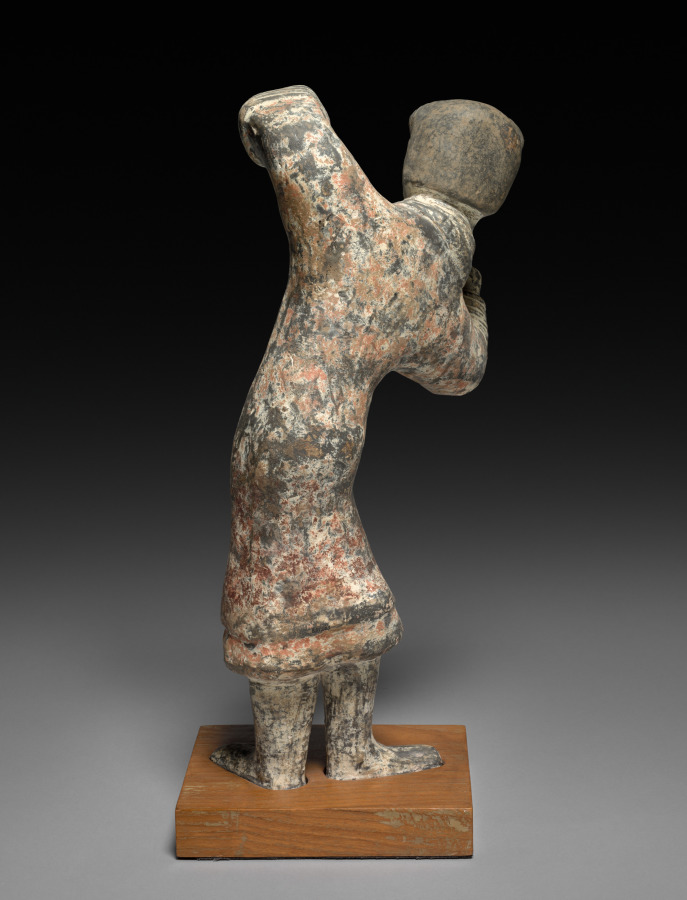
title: Dancing Figure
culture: China, style of Han dynasty (202 BCE–220 CE)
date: c. 1850–c. 1950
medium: painted plaster of Paris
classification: Sculpture